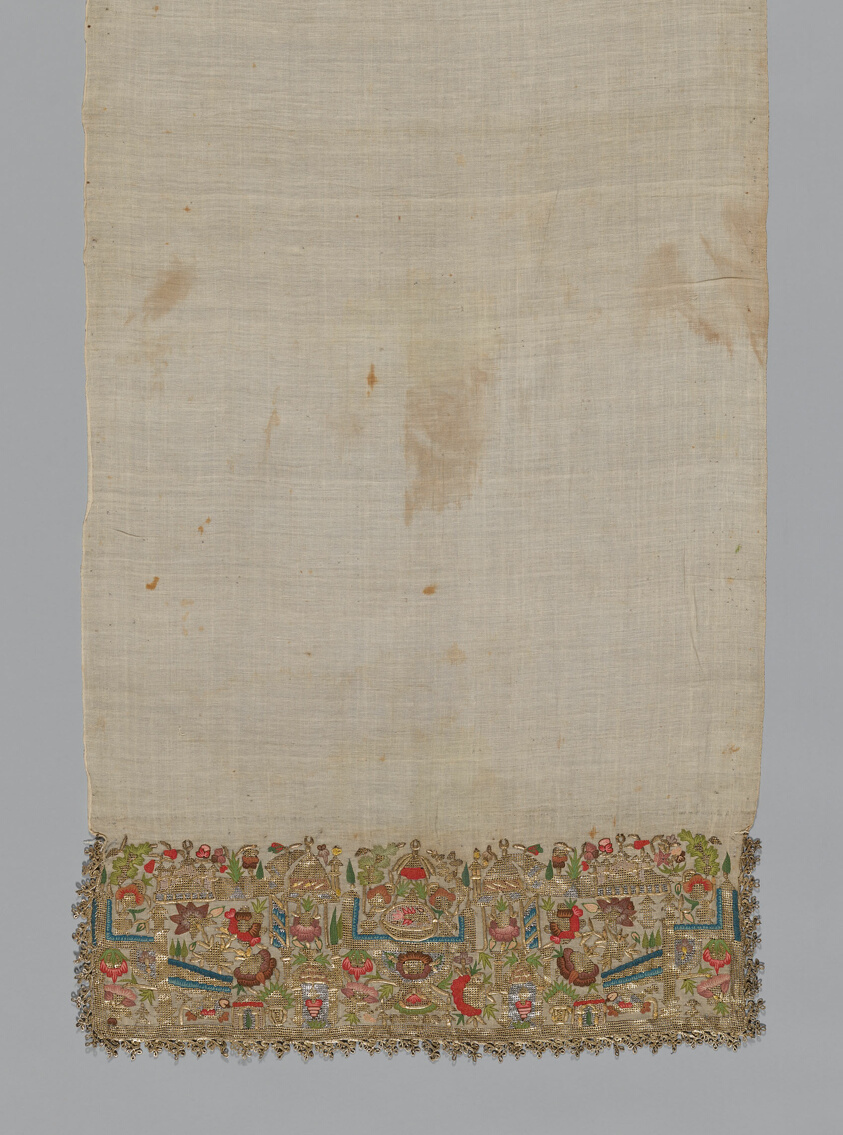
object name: Textile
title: Towel or Napkin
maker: Turkey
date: 1850/1900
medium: embroidered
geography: Turkey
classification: textile; needlework (visual works); weaving